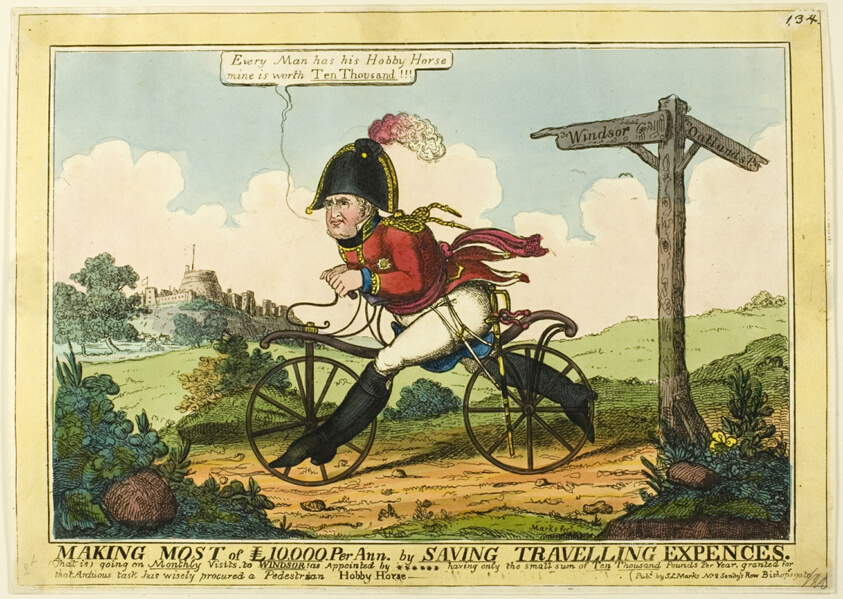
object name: Print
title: Making the Most of £10,000 per Ann. by Saving Travelling Expences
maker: J. Lewis Marks (English, 1769-c. 1832)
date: 1819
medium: Hand-colored etching on ivory wove paper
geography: England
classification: etching; print; prints and drawing